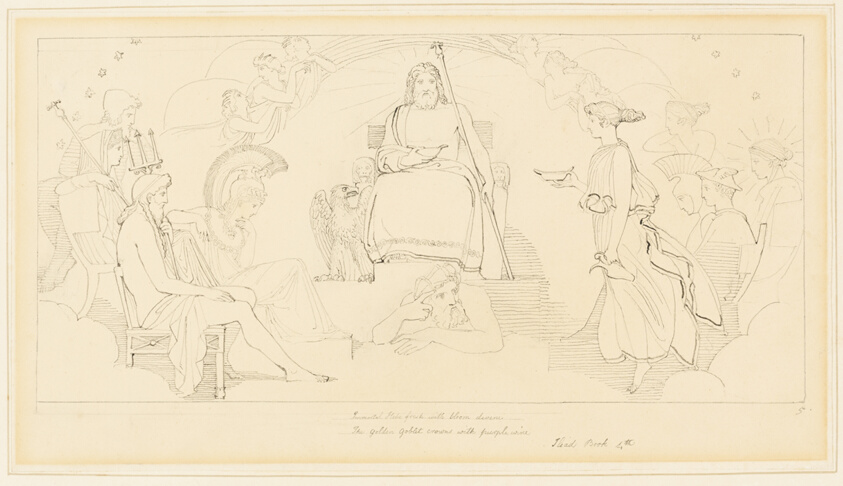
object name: Drawing and Watercolor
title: The Council of the Gods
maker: John Flaxman, II; English, 1755-1826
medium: Pen and gray ink, over graphite, on cream wove paper, laid down on ivory wove paper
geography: England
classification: pen and ink drawings; drawings (visual works); prints and drawing